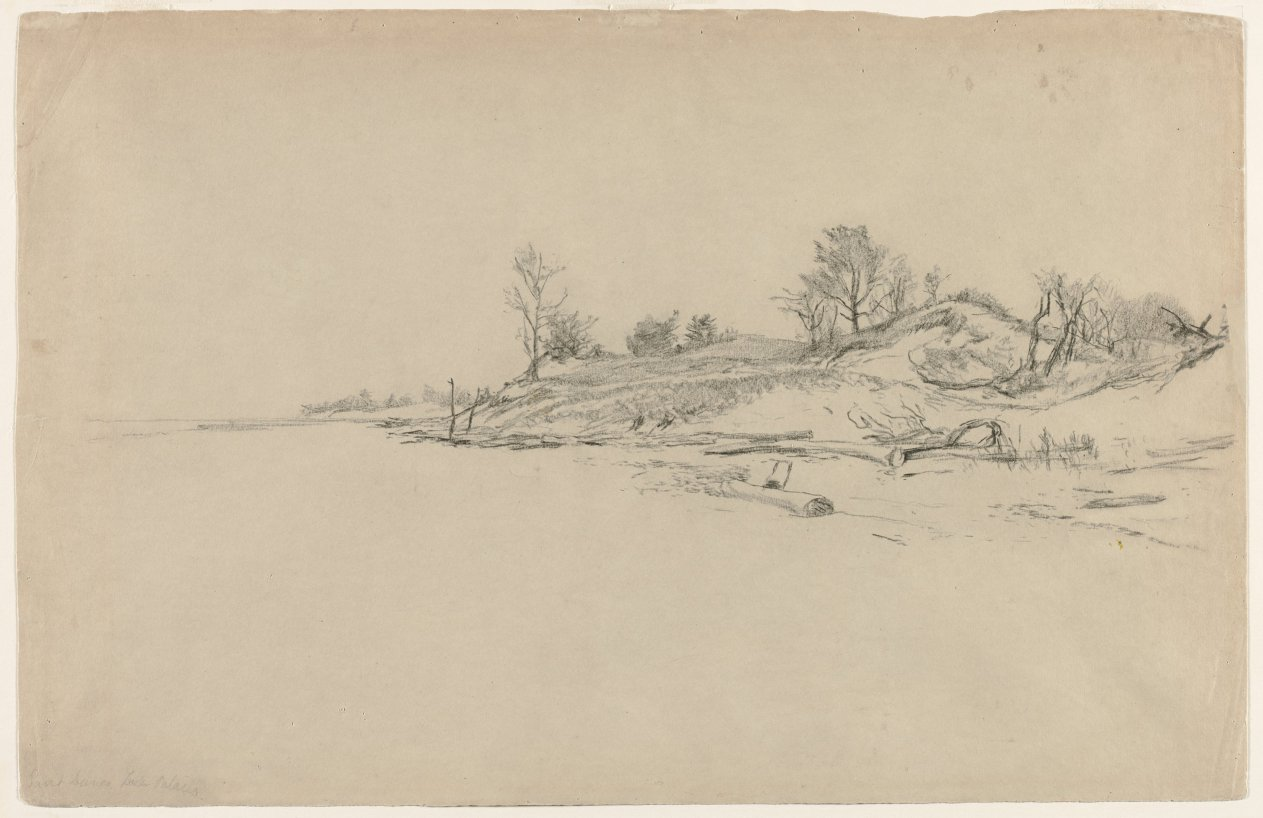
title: Sand Dunes, Lake Ontario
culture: America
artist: Homer Dodge Martin (American, 1836–1897)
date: c. 1874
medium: Black crayon ?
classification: Drawing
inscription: By artist [?] lower left, in graphite: "Sand Dunes. Lake Ontario"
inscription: Verso, signed [?]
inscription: Lower left, in graphite: "Dunes Lake Ontario / HDMartin"